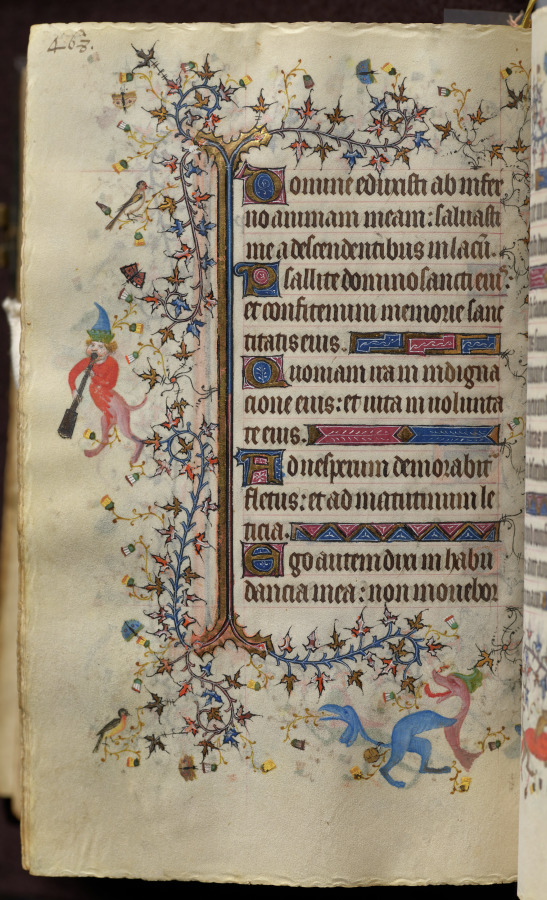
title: Hours of Charles the Noble, King of Navarre (1361-1425): fol. 228v, Text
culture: France, Paris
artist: Master of the Brussels Initials and Associates (French)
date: c. 1405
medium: ink, tempera, and gold on vellum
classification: Bound Volume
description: This precious volume was obviously highly prized by its owner, the French-born King of Navarre, who had his coat of arms painted on no less than twenty folios. Rather than directly commissioning this manuscript from a specific workshop, it seems that Charles the Noble acquired his book of hours -- perhaps ready-made for the luxury market -- while on a trip to Paris in 1404-05. A collaborative effort, six painting styles are evidenced within the pages of this codex, those of two Italians, two Frenchmen, and two Netherlanders. The painter who was responsible for the planning and decoration of the book, and who produced seventeen of the large miniatures, was a Bolognese artist known as the Master of the Brussels Initials. His principal assistant, responsible for most of the borders, was a Florentine who signed his name "Zecho" da Firenze on folio 208 verso.